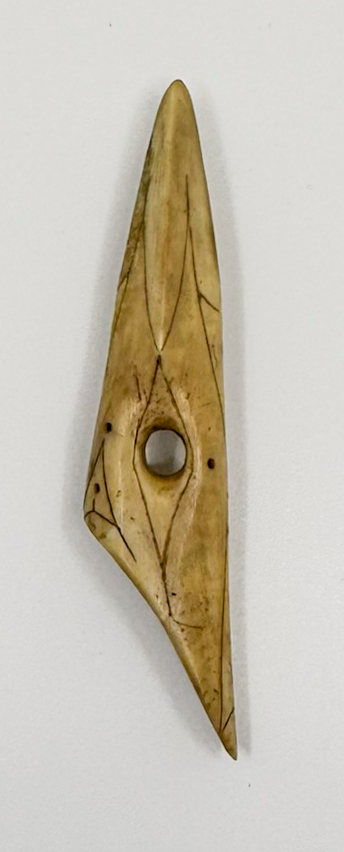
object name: Decorative Arts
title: Harpoon Point with Fine Incised Lines and Threading Holes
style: punuk, eskimo, Pre-Columbian, americas, Arts of the Americas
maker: Carver unknown (Punuk); Kitneapaluk, St. Lawrence Island, Alaska, United States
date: c. 900 CE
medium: Walrus ivory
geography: Alaska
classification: bone; american decorative arts; tool; decorative arts; art of the americas